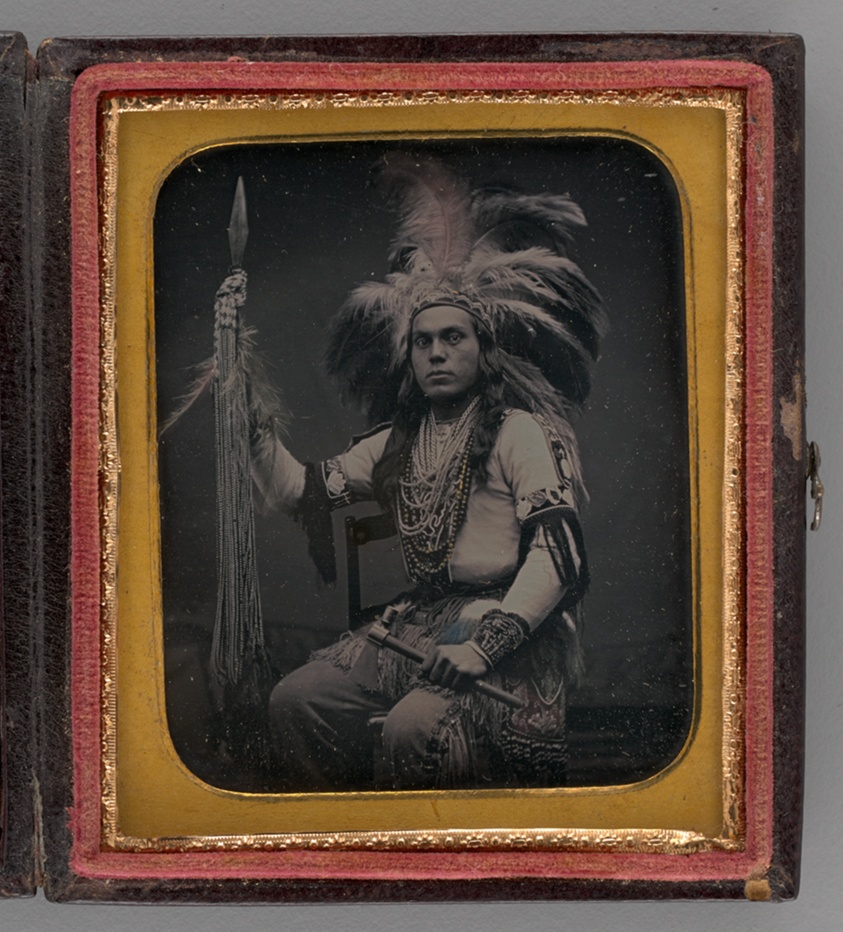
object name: Photograph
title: Untitled (Portrait of a Man with Headdress)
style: 19th century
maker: Unknown maker; American, 19th century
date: 1855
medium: Daguerreotype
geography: United States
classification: portrait; photograph; photographic process; photography; portrait; daguerreotype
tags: lundberg collection, portraits, portraits: male subject, native american, portrait